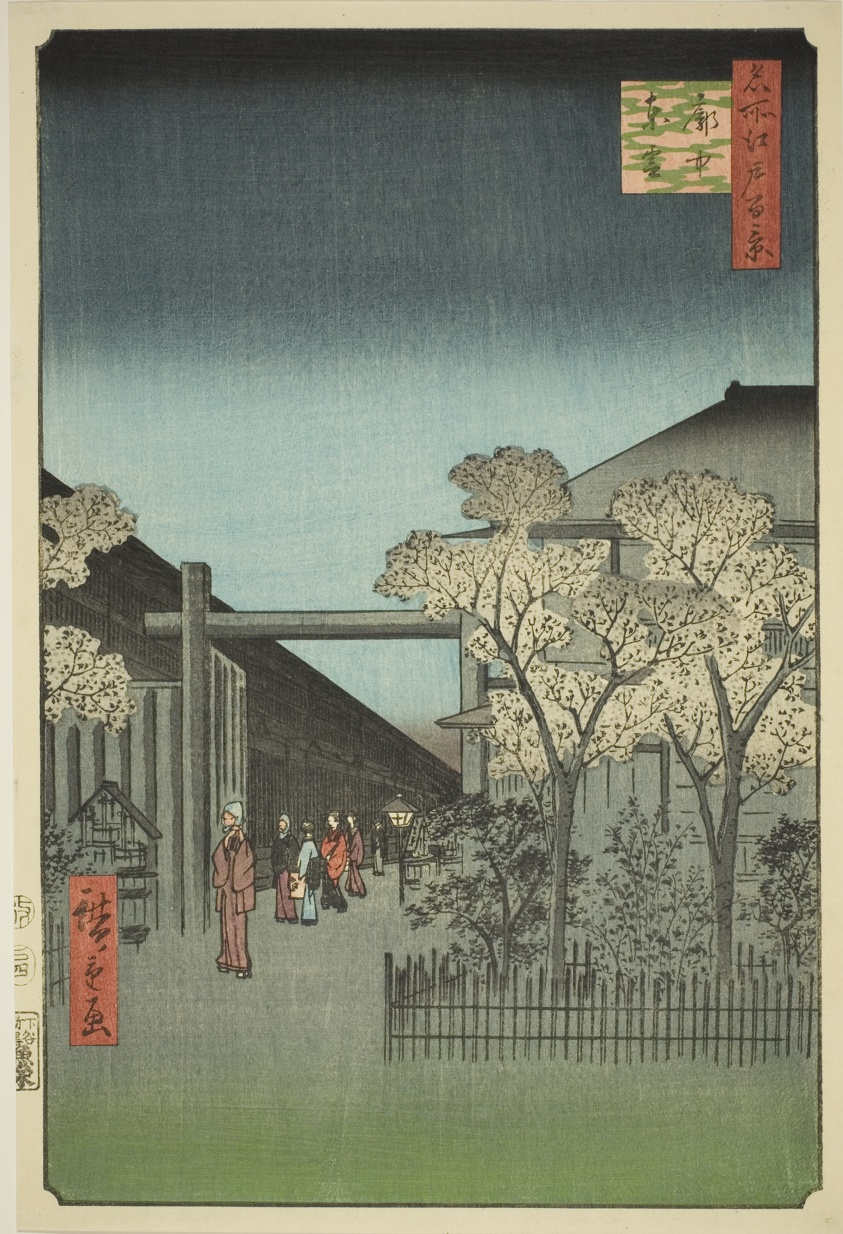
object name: Print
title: Yoshiwara Licensed Quarters at Dawn (Kakuchu shinonome), from the series "One Hundred Famous Views of Edo (Meisho Edo hyakkei)"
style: Japanese (culture or style)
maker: Utagawa Hiroshige 歌川 広重; Japanese, 1797-1858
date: 1857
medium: Color woodblock print; oban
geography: Japan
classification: woodblock print; print; asian art